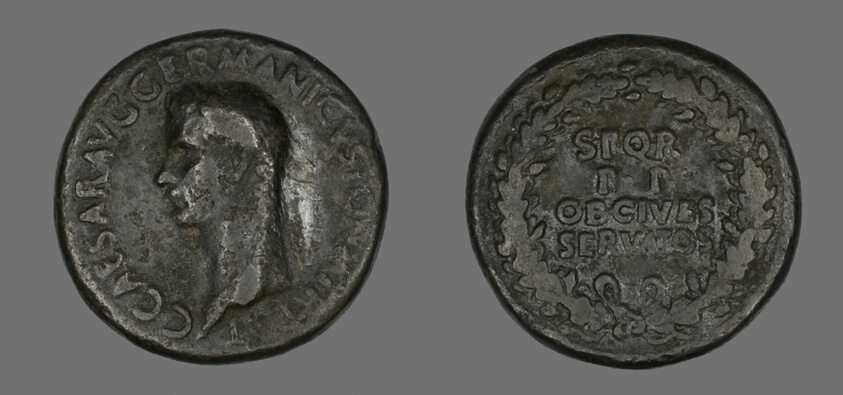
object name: Coin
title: Sestertius (Coin) Portraying Germanicus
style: roman (ancient, style or period)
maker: Roman, minted in Rome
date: 37-38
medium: Bronze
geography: Roman Empire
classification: coin; ancient art